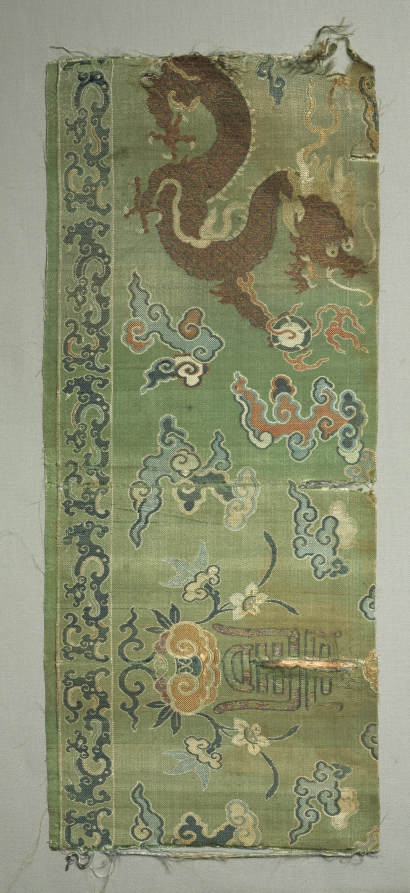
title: Fragment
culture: China, 18th century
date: 1700s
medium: twill ground; silk diasper weave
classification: Textile